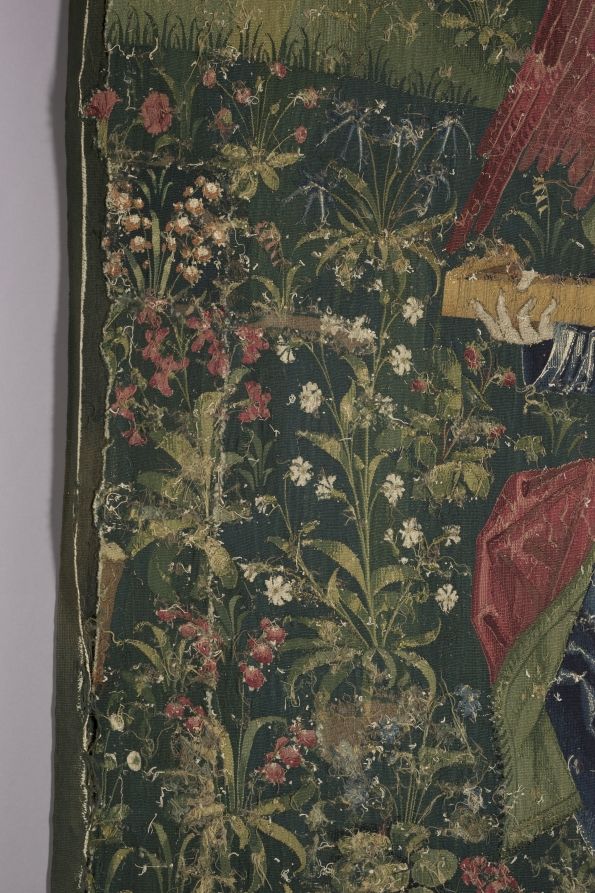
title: The Triumph of Eternity (from Chateau de Chaumont set)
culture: France, Lyon(?), early 16th century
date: 1512–15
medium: silk and wool; tapestry weave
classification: Tapestry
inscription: French verse in Gothic letters translates as follows: "Nothing triumphs by right authority, Unless it be conducted by Eternity. Nothing is permanent beneath the firmament, But above us triumphs Eternity."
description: The Triumph of Eternity is represented by the Coronation of the Virgin. Dressed in crimson velvet with an opulent brocaded velvet shawl, the Virgin is seated in the center as two angels hold a crown over her head. Five musical angels surround her playing an organ, recorder, straight cornetto, harp, and lute, while another sings from an open music book. The scenes in the set display a conservative style in which the figures are placed in shallow landscapes, thereby ignoring pictorial innovations for depicting space and mass. The verse in Old French at the top states: Nothing triumphing by due authority Remains permanent and durable. Nothing is permanent under the heavens, But above, eternity triumphs.